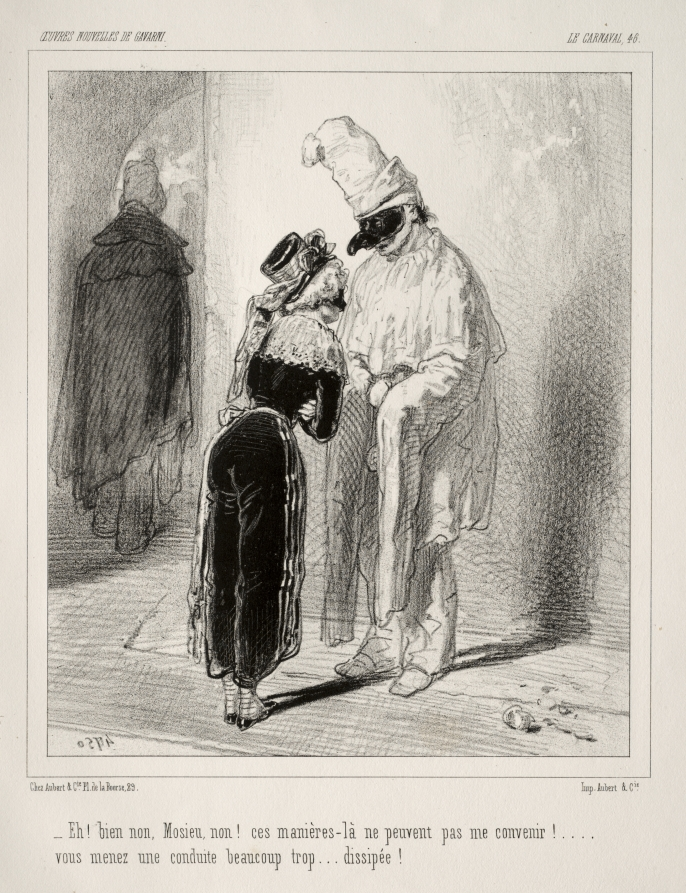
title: Carnaval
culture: France, 19th century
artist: Paul Gavarni (French, 1804–1866)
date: c. 1841–47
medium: lithograph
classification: Print